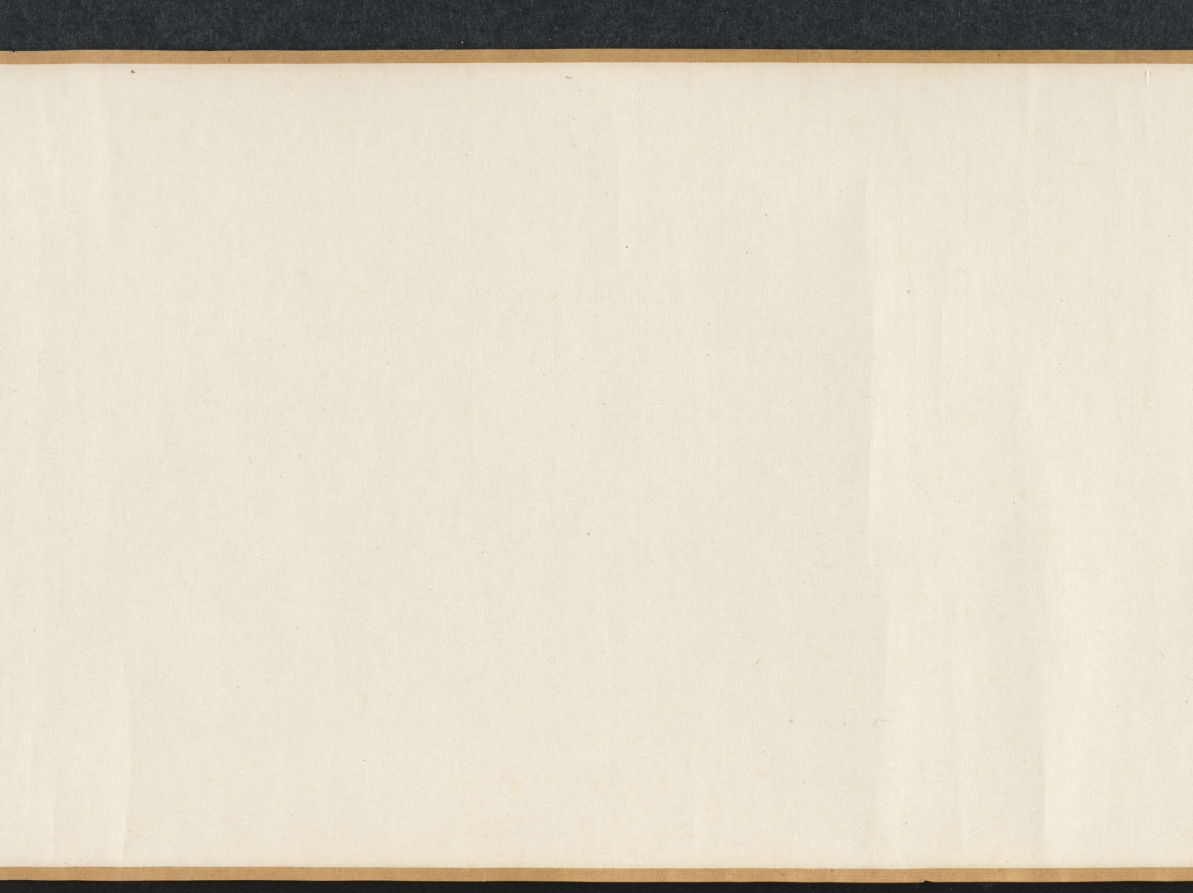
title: Zhao Mengfu Writing the Heart (Hridaya) Sutra in Exchange for Tea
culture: China, Ming dynasty (1368–1644)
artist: Qiu Ying (Chinese, 1494–1552)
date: 1542–43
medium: handscroll, ink and light color on paper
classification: Painting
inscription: Inscription accompanying text of "Heart" sutra, by Wen Zhengming 文徵明 (1470-1559): Zhengming 徵明, written in a boat at Kunshan 崑山, on the twenty-first day of the ninth month, in the renyin 壬寅 year, the twenty-first year of the Jiajing era [1542].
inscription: Colophon by Wang Shih-mou: Chou Yü-shün [Feng-lai] of K'un-shan was a scholarly, refined connoisseur of antiquities. He had acquired the poem written by Chao Ch'eng-chih [Chao Meng-fu] about the exchage of tea for Chao's calligraphy of the Prajna sutra. But the sutra itself, also written by Chao Meng-fu, is lost. He therefore asked Ch'iu Shih-fu [Ch'iu Ying] to do a painting and had Wen Cheng-ming, the artist-in-attendance, write the Hridaya Sutra in the "small, regular" style for replacement. Both works are so excellent that even Chao Meng-fu himself would certainly applaud if he should be reborn to see them. I, Shih-mou, had gotten possession of this scroll from the family of Chou Yü-shün, and since it was so wonderfully matched with one of the treasures in my collection. the Hridaya Sutra written by Chao Meng-fu for Priest Li in "running script," like the reuniting of two halves of a jade pi, I completed the scroll with the several colophons written for the "tea-exchange" poem. I did this because the painting of Ch'iu Ying and the calligraphy of Wen Cheng-ming are definitely masterpieces by themselves with absolutely no need to depend on any of the colophons written for the Chao Meng-fu poem. Furthermore, the two sons of Wen Cheng-ming, Shou-ch'eng [Wen P'eng] and Hsiu-ch'eng [Wen Chia]. have each written a colophon explaining the reason for replacing the calligraphy. As their writings are both acceptable for high standard, I didn't want to throw them away. [So by separating these into two scrolls] I was able to get two complete works of art in one clever stroke. I was quite pleased with myself, and hope that those who see this scroll shall not get suspicious because of the missing colophons. Wang Shih-mou wrote in his Jih-sun-chai study, on the first day of the tenth month, in the chia-shen year of the Wan-li era [1584].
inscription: Colophon by Wen P'eng: I-shao [Wang Hsi-chi] wrote in exchange for a flock of geese. Su Tung-po wrote in exchange for meat. Both episodes have become legends of a thousand years. Sung-hsüeh [Chao Meng-fu] "teased" Priest Kung for tea, and the story was immediately immortalized in the poems by all the famous scholars of the times. Indeed, how could one say his humor and elegance are not equal to the ancient worthies? Unfortunately, the poetry has survived but the writing of the sutra is lost. Yü-shün [Chou Feng-lai] therefore asked my father to make up the writing and so here is the complete work of art. Respectfully inscribed by Wen P'eng in the mid-summer of 1543.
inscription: Colophon by Wen Chia: Sung-hsüeh [Chao Meng-fu], in exchanging tea leaves for his writing of the Prajna, had put himself in the company of Yu-chün [Wang Hsi-chih] who exchanged geese for his writing of the Huang-t'ing sutra [the Yellow Chamber, or the Wai-ching ching, a Taoist text attributed to the Yellow Emperor]. However, was this romantic and cultivated gesture really intended for such small things? Actually, he was only proud that the excellence of his calligraphy had made him worthy to be the successor of the Ch'in Dynasty master. Since, very unfortunately, Chao Meng-fu's writing [of the Prajna] was already lost, my father therefore agreed to replace it, and did the calligraphy in the style of the Yellow Chamber. In addition, Yu-shün [Chou Feng-lai] had asked Mr. Ch'iu Shih-fu [Ch'iu Ying] to do a painting of the sutra writing story in the style of Li Lung-mien at the head of the scroll. Now it would seem the entire episode should go down in history for immortality. Respectfully recorded by Wen Chia, on the eighth day of the eighth month, in the year of k'uei-mao [1543]. trans. WKH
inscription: 4 colophons and 23 seals: 1 colophon, dated 1543, and 2 seals of Wen Peng (1498-1573); 1 colophon, dated 1543, and 2 seals of Wen Chia (1501-1583); 1 colophon, dated 1584, and 3 seals of Wang Shih-mou (1536-1588); 2 seals of Chou Feng-lai (16th c.); 3 seals of Sung Lo (1634-1713); 5 seals of the Ch'ien-lung emperor (r. 1736-95); 1 colophon, dated 1902, and 1 seal of Fei Nien-tz'u (1885-1905); 4 seals of Wan-go H. C. Weng (b. 1918); 1 seal unidentified.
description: The Yuan dynasty calligrapher Zhao Mengfu (1254–1322) is said to have transcribed the Heart Sutra for a certain priest named Li in exchange for tea. Later, during the Ming dynasty, the professional painter Qiu Ying from Suzhou painted this scene for his patron. Here, Zhao Mengfu holds a brush and has a piece of paper laid out before him. On the table is an ink stone, an ink stick, and a small water dropper. Drops of water would dissolve the ink stick into liquid ink when it was ground on the flat square stone.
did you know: Qiu Ying was born to a peasant family, but his natural talent led him to a successful career as a professional painter with wealthy patrons.